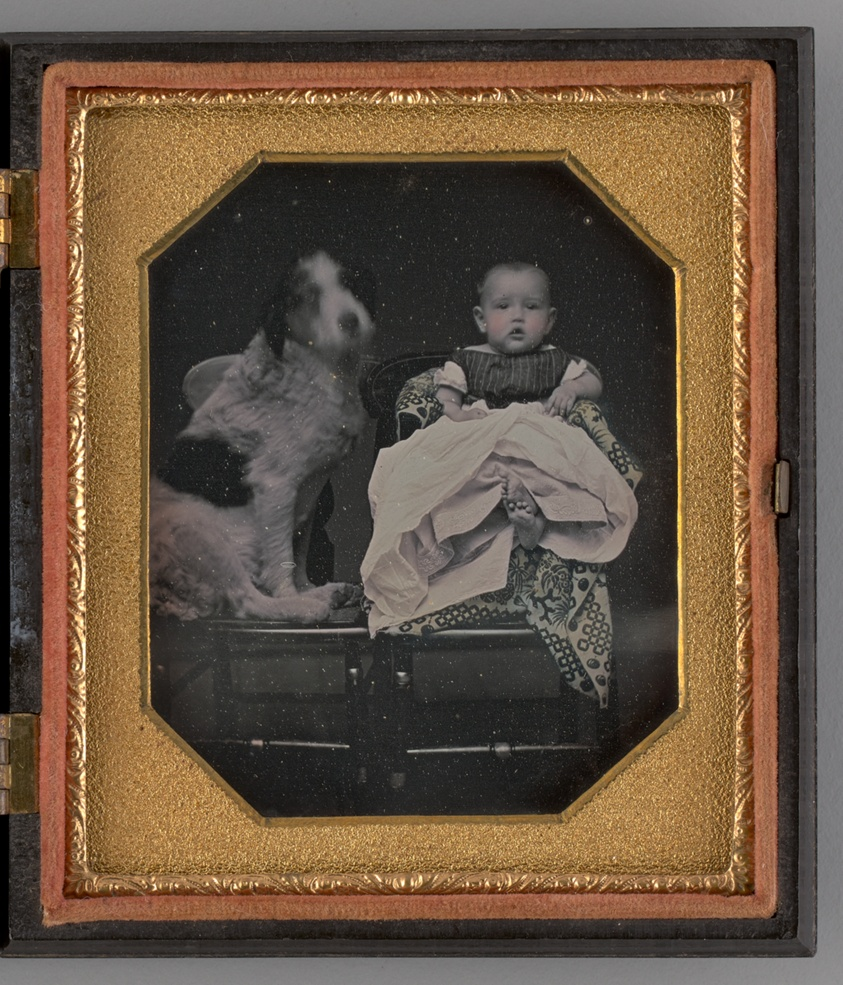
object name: Photograph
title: Untitled (Portrait of a Baby and Dog)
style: 19th century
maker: Unknown maker; American, 19th century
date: 1858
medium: Daguerreotype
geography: United States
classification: portrait; photograph; photographic process; photography; portrait; daguerreotype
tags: lundberg collection, portrait, photography, dogs, babies, animals, portraits, portraits: child subject